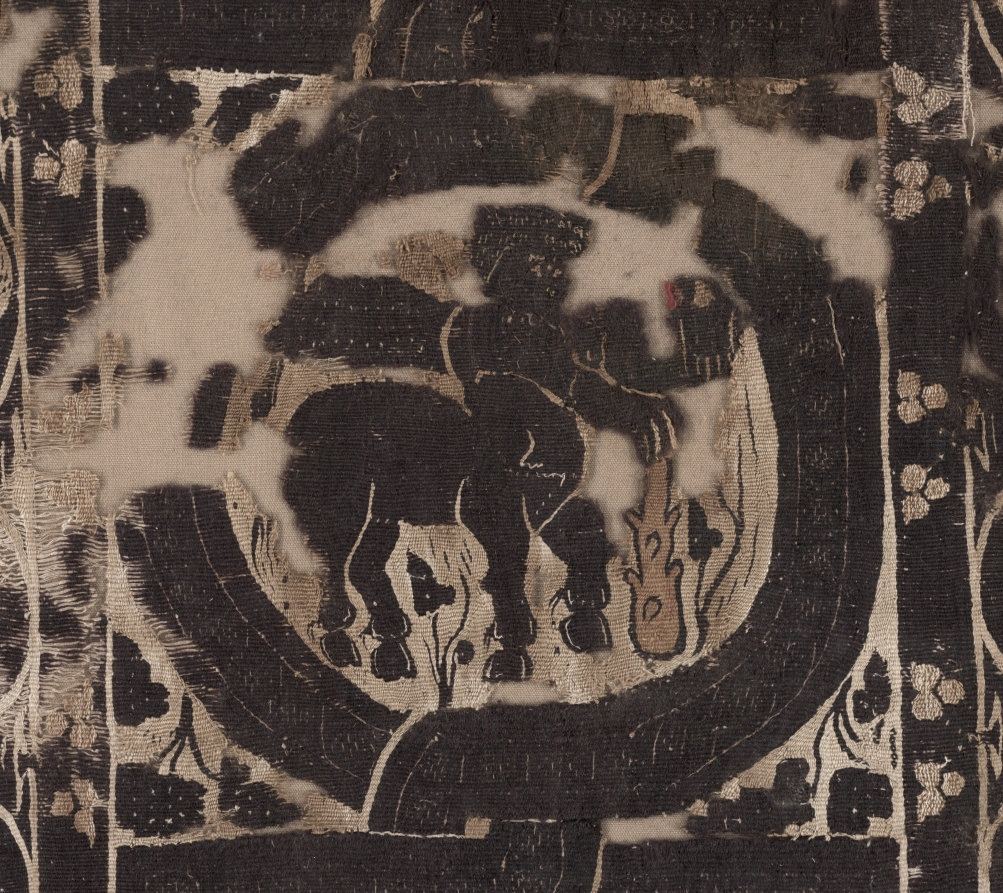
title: Curtain Panel with Scenes of Merrymaking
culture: Egypt, Byzantine period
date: 500s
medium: Linen, undyed; wool: dyed; tapestry weave with supplementary weft wrapping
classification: Textile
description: This large panel conveys merrymaking, wealth, and power through its symbolic imagery and deep purple color. It was originally part of a luxurious wide curtain with similar panels alternating with plain linen panels. Although woven in Christian Egypt, the panel is dominated by pagan subjects. A nude male stands beside a dancing female in transparent clothing in each of the three squares, alternating with centaurs (half-man, half-horse creatures) in roundels. In the central square, Dionysus, the god of wine, holds a grapevine and a weary Hercules leans on his club below. The lively animal imagery conveys wealth because few could afford animals such as lions, bulls, and hares.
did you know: The textile industry drove the Egyptian economy, dominated by the flax plant from which linen is derived.